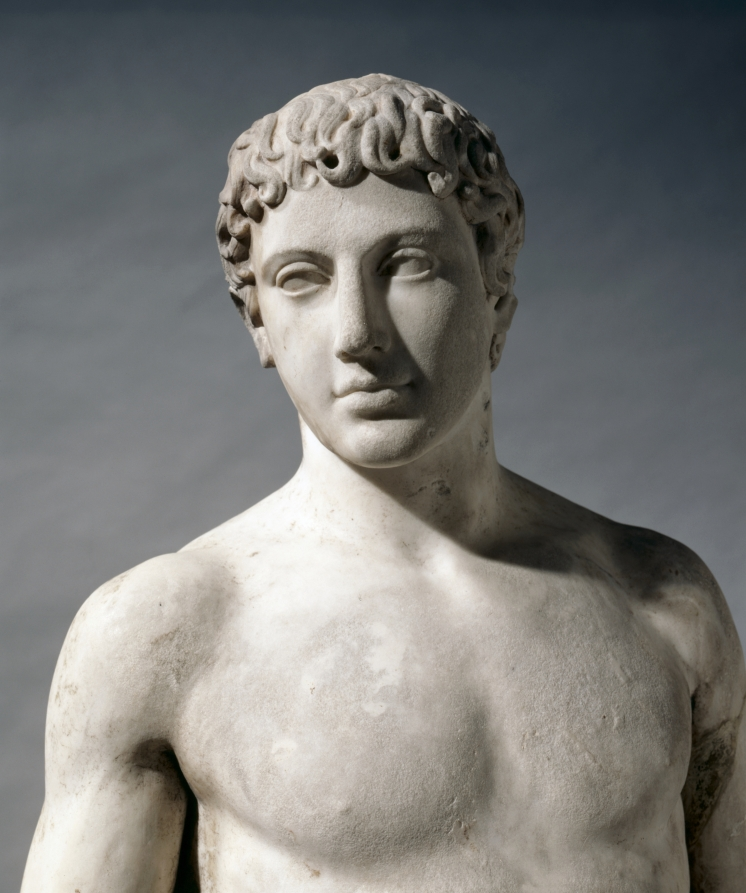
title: Statue of an Athlete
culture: Italy, Roman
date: 1–100 CE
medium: marble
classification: Sculpture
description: This idealized athlete recalls Greek sculptural types invented and popularized during the 400s BC. Large-scale athletes and other sculptures like this were originally created by famous artists as sanctuary dedications. Centuries later, they were widely copied and adapted by Roman sculptors, whose clients sought their own versions of earlier masterpieces. Working in marble rather than bronze, these sculptors added certain elements for stability, such as the struts and the large tree trunk beside the right leg here. Sculptures like this one are profoundly complex, made by and for Romans but descended from Greek ancestors.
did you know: For many years, this sculpture stood in the rotunda of the Cleveland Museum of Art.